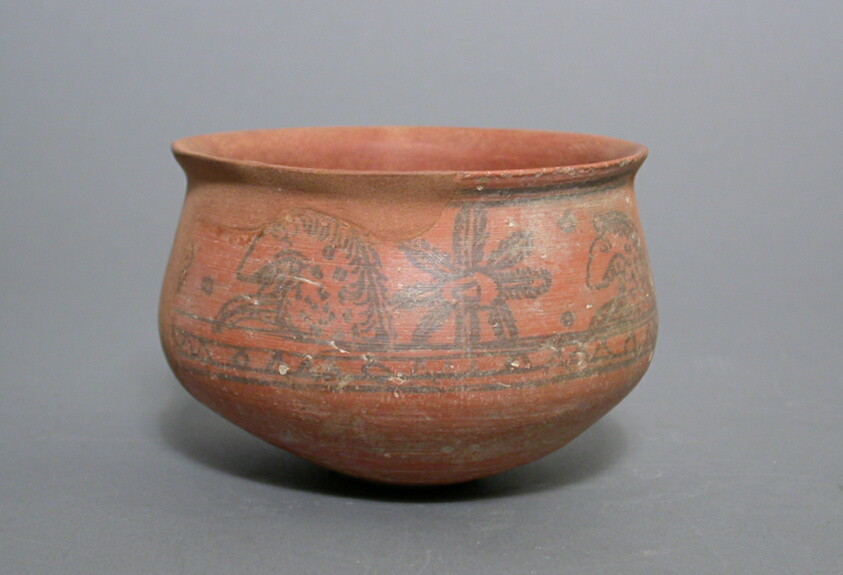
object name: Vessel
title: Painted Bowl with Faunal and Floral Design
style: South Asian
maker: Pakistan; Ancient region of Gandhara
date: 5th century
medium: Terracotta with black pigment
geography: Gandhara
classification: bowl; earthenware; dish (vessel); ceramics; asian art; vessel